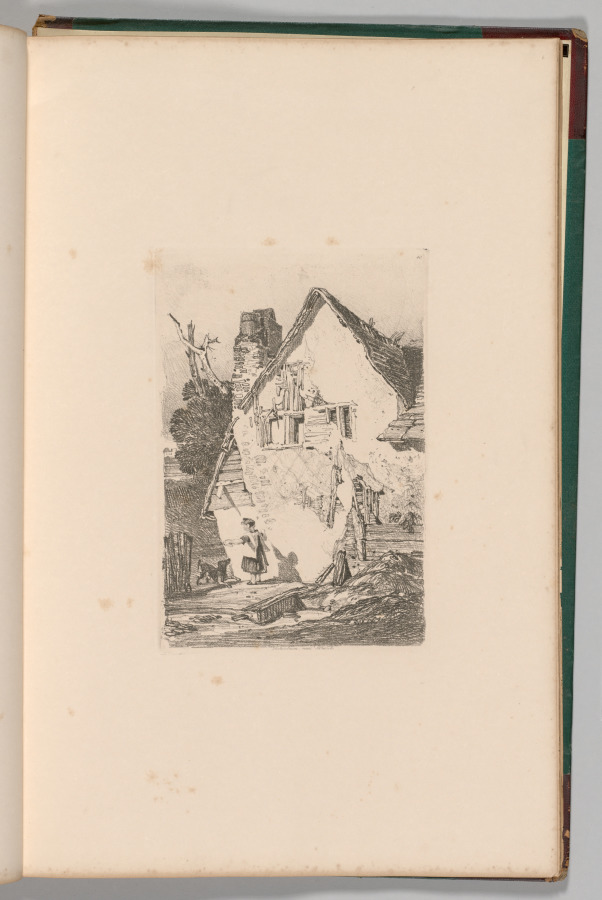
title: Liber Studiorum: Plate 40, Lakenham, near Norwich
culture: England, 19th century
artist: John Sell Cotman (British, 1782–1842)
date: 1838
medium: softground etching, from a bound volume containing 48 plates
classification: Bound Volume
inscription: In plate, within image, upper right: 40; in plate, below image: Lakenham, near Norwich